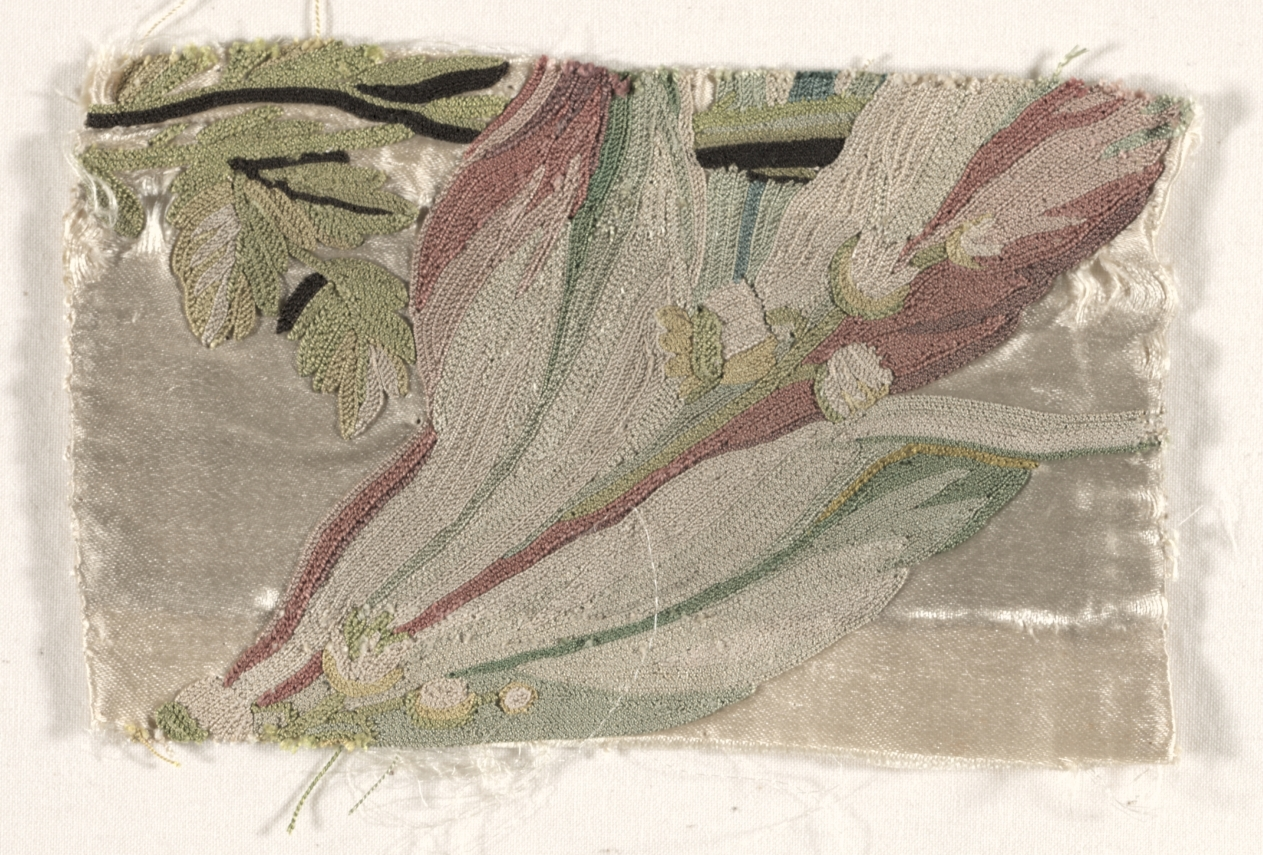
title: Coverlet Fragment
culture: France, 18th Century, period of Louis XVI (1774-1793)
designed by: Philippe de Lasalle (French, 1723–1805)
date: c. 1760–1770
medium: embroidered satin and silk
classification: Textile